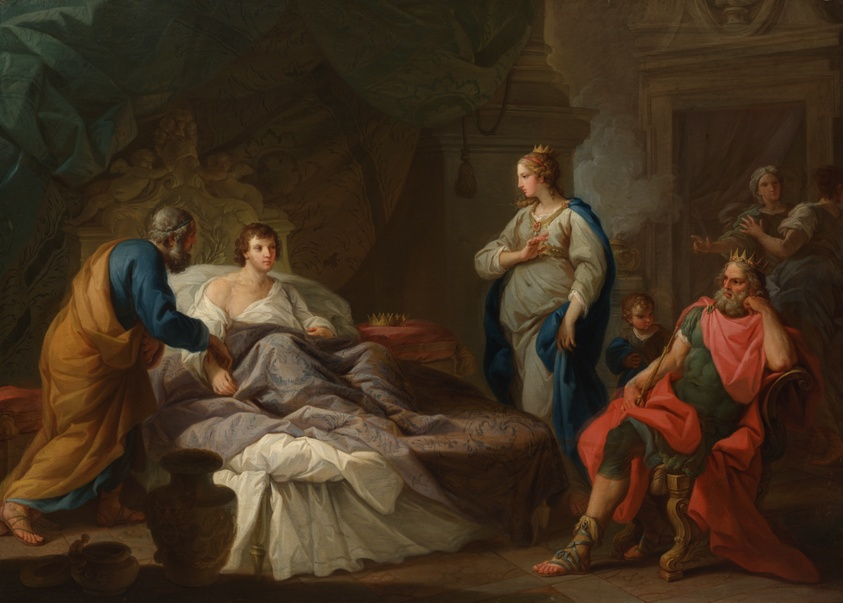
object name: Painting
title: Antiochus Yearning for Stratonice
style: 18th Century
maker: Stefano Pozzi (Italian, 1699–1768)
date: c. 1740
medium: Oil on canvas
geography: Italy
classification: painting; paint; oil paintings (visual works); oil on canvas; Italian; european painting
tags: illness, love, woman, man, Devotion, parents, king, Maiden, sons, fathers, families, bed, interior, fabric, textile, children